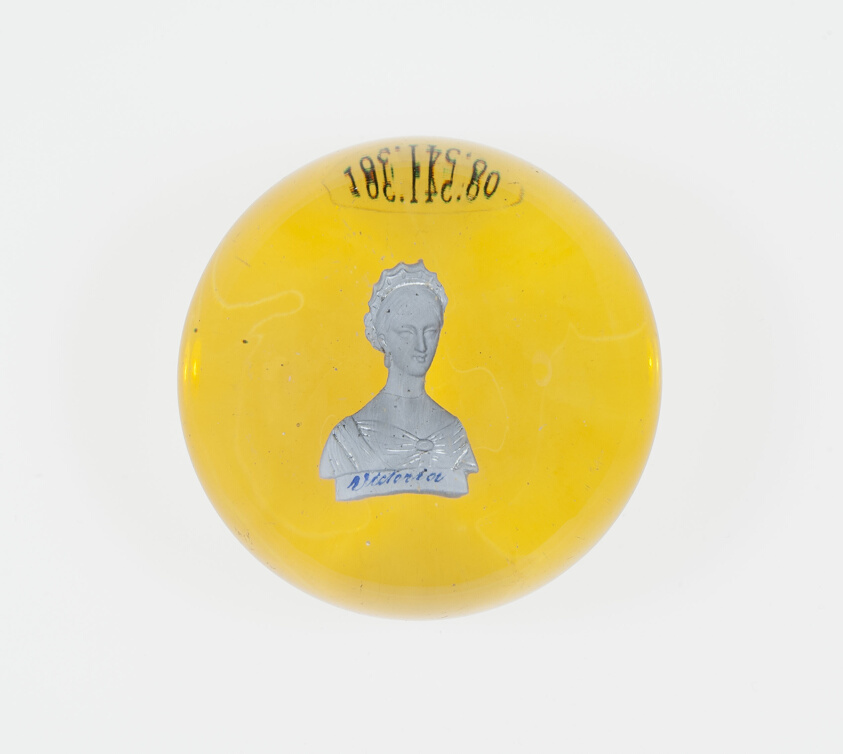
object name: Glass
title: Paperweight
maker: Saint-Louis Glassworks (Cristalleries de Saint-Louis); Lorraine, France, founded 1586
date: Mid 19th century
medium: Glass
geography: Saint-Louis-lès-Bitche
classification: paperweight; glass